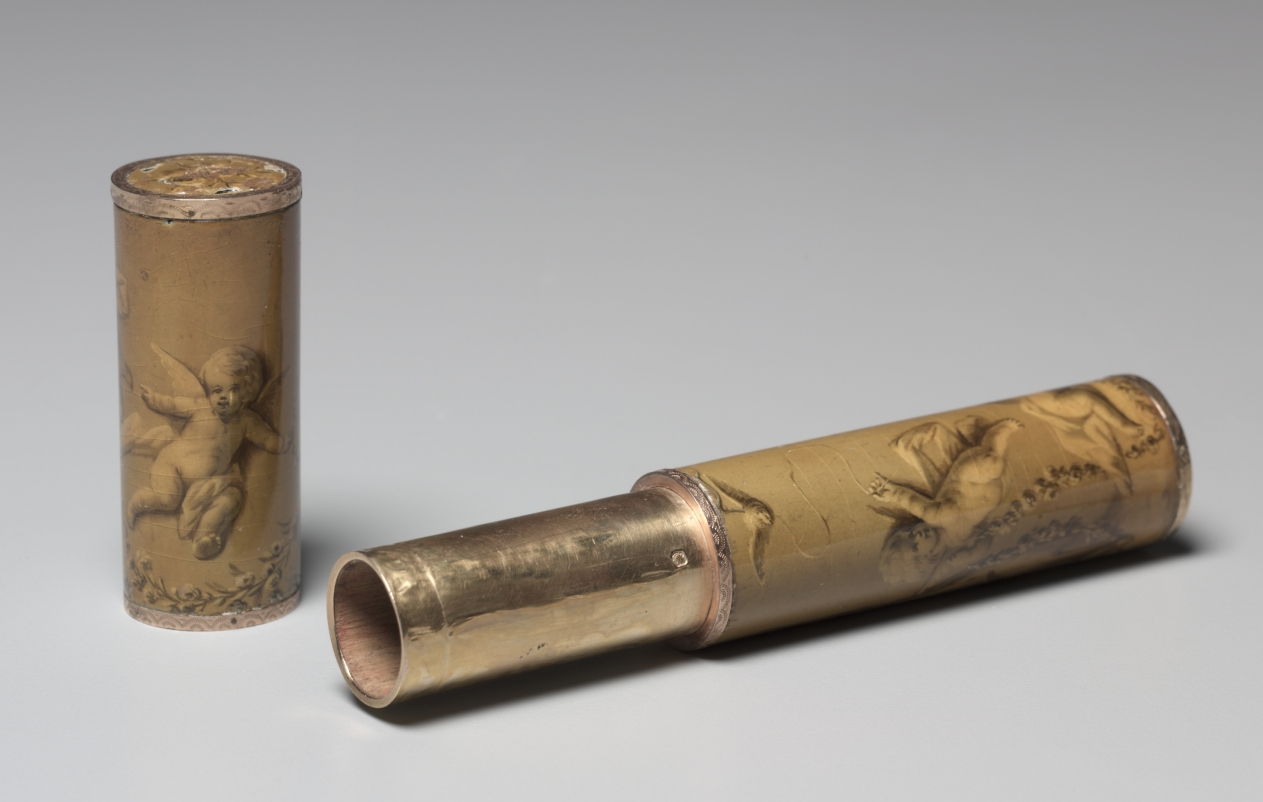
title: Needle Case (Etui à Aiguilles)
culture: France, Paris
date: 1768–69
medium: painted wood, gold mounts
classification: Miscellaneous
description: The material of cases like these delineated the status of the holder. More expensive materials such as ivory, tortoiseshell, or silver were reserved for wealthier users while more common cases were made of lacquered papier-mâché or wood. This wooden case is decorated with vernis martin, a domestic varnish imitating East Asian true lacquer. The sinuous lines, floral garlands, and putti, personifications of love in the form of winged infants, exemplify typical rococo imagery.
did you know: In the 1500s these cases were commonly fabricated to hold pins and needles for master tailors, but became more widely produced for women during the 1700s.